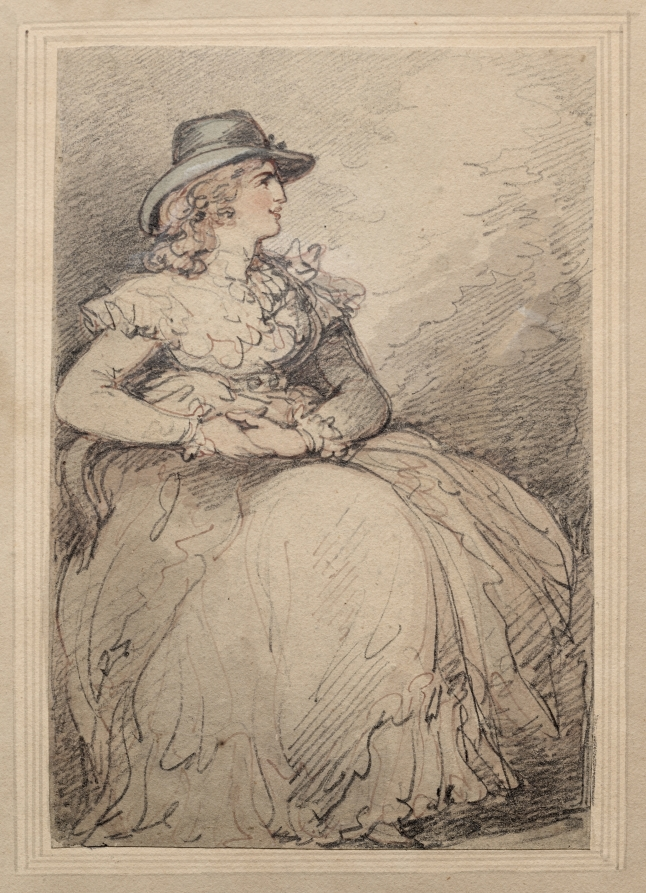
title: Lady Elliott, Commonly Called Dolly The Tall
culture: England, 18th century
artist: Thomas Rowlandson (British, 1756–1827)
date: 1775–1827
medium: graphite, pen and brown ink, and watercolor, heightened with traces of white gouache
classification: Drawing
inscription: Lower center, in graphite: "Lady Elliott commonly called / Dolly the Tall--"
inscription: Verso, lower right, in graphite: "[1/2?] [Imb?] [Plusi?]"